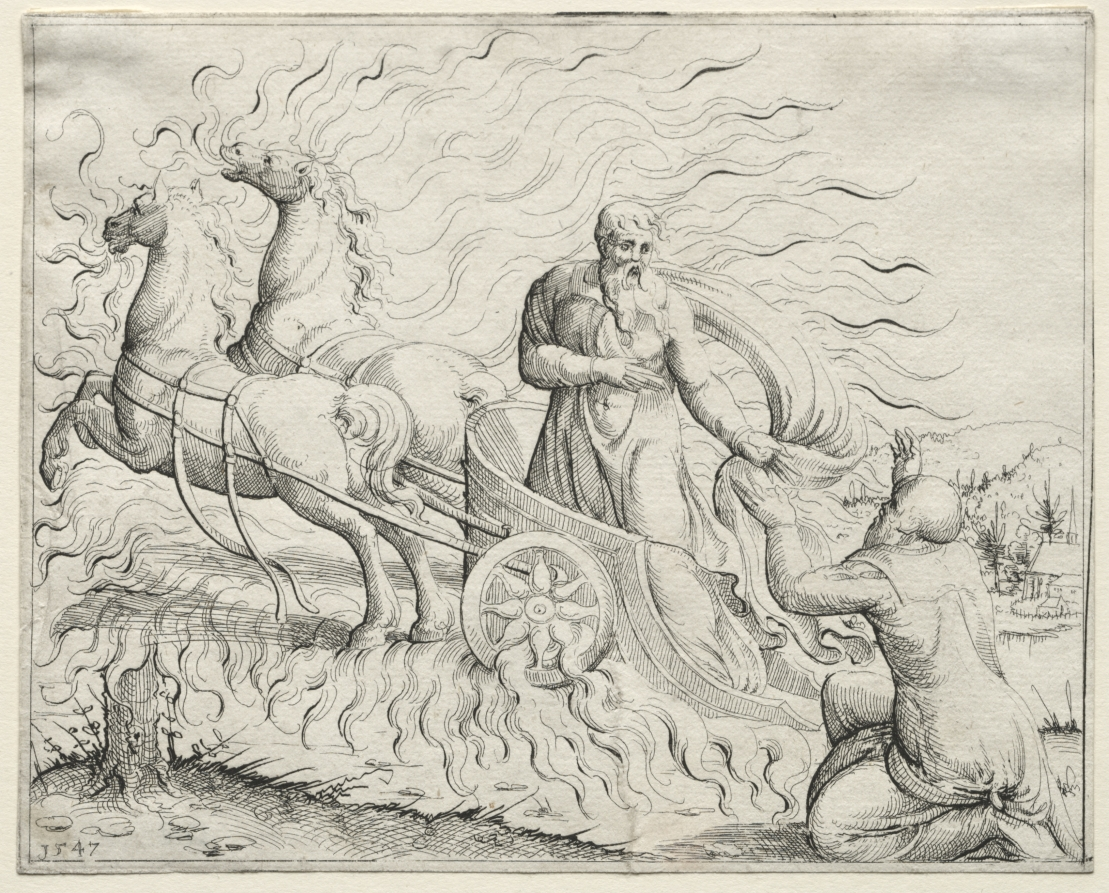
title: Elijah Ascends to Heaven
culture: Germany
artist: Augustin Hirschvogel (German, 1503–1553)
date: 1547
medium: etching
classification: Print